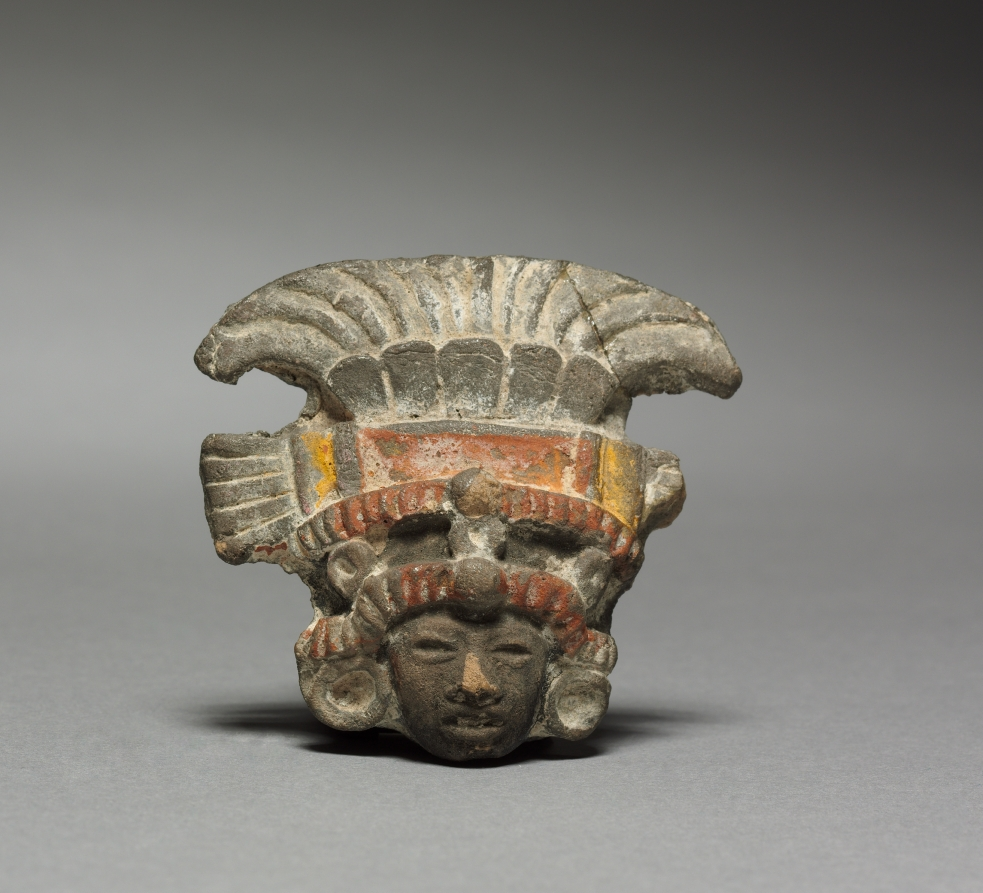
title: Figurine Head Fragment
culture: Central Mexico, Teotihuacán style, Classic period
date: 1–550 CE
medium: molded earthenware with pigment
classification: Ceramic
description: The use of press molds at Teotihuacan permitted mass production of elaborately costumed human figurines. Lavishly ornamented headdresses are also worn by figures depicted on Teotihuacan's fresco-painted walls.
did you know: Showy rows of sculpted feathers may represent those of the shimmering green quetzal bird.